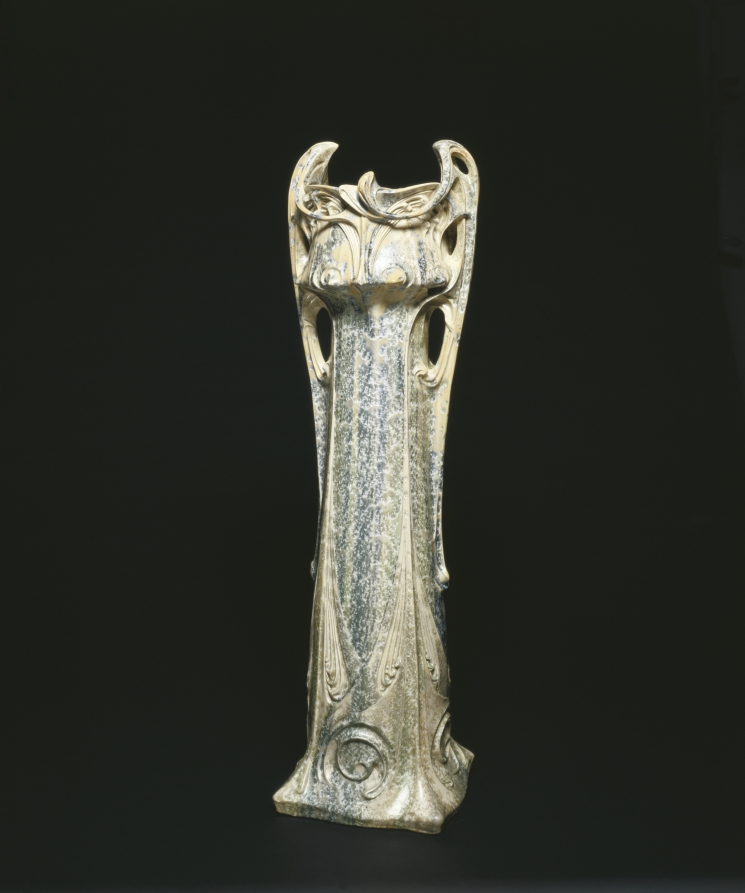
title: Vase des Binelles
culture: France, Sèvres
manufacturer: Sèvres Porcelain Factory (French, est. 1756)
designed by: Hector Guimard (French, 1867–1942)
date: 1903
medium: stoneware with crystalline glaze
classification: Ceramic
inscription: Gres 1903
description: In 1899, French architect Hector Guimard designed the Castle Henriette, built on Rue des Binelles in Sèvres, a suburb of Paris, France. This stoneware vase is named for the street and bears similarities to architectural features of Castle Henriette. The vase’s asymmetrical and curvilinear design showcases the trademarks of the Art Nouveau style. Five examples of the Vase des Binelles were made by the still-operating Sèvres Manufactory, whose ceramics were celebrated for their innovative decoration and design since its establishment in the mid-1700s.